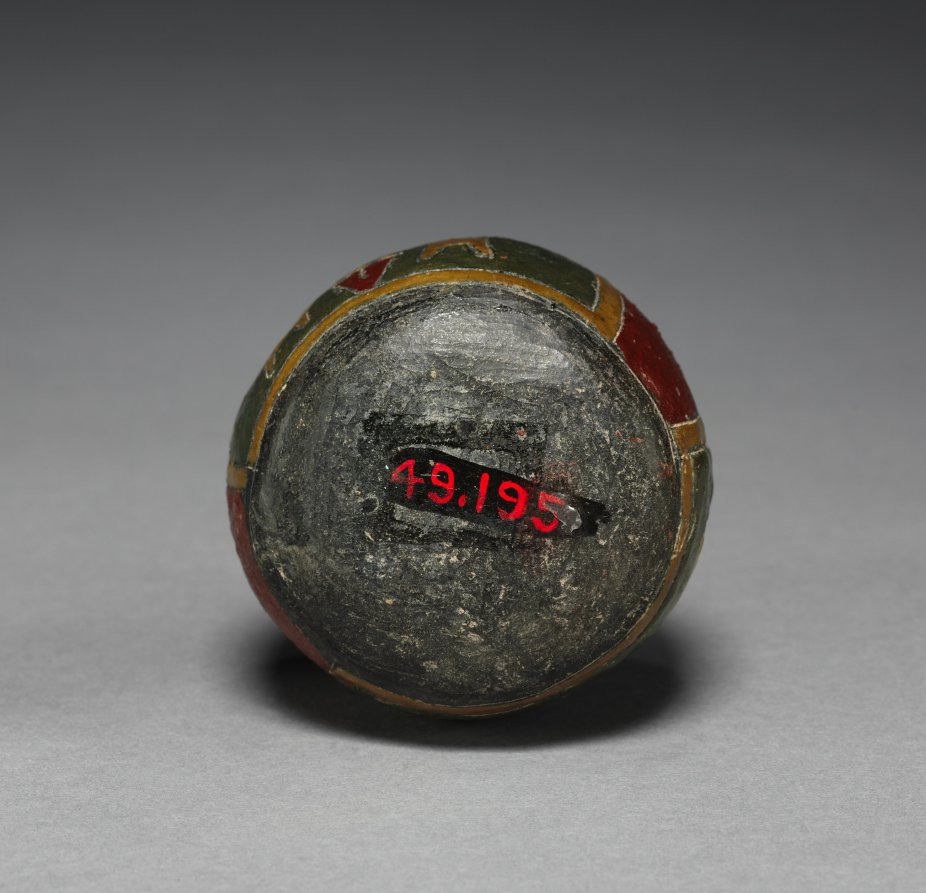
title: Small Bottle with Feline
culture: Peru, South Coast, Paracas (Cavernas) style (700 BCE–1 CE)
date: 700–1 BCE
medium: earthenware, resin-based paint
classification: Ceramic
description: Little is known of the meaning of the beautifully abstracted felines so often incised on Paracas ceramics. The designs achieve much of their complexity through color applied as resin-based paint after the vessel was fired in a smoky atmosphere that blackened its surface.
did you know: Small, wild, reclusive felines, pampas cats live on the margins of agricultural fields, where they prey on rodents and other pests that are a farmer’s bane.